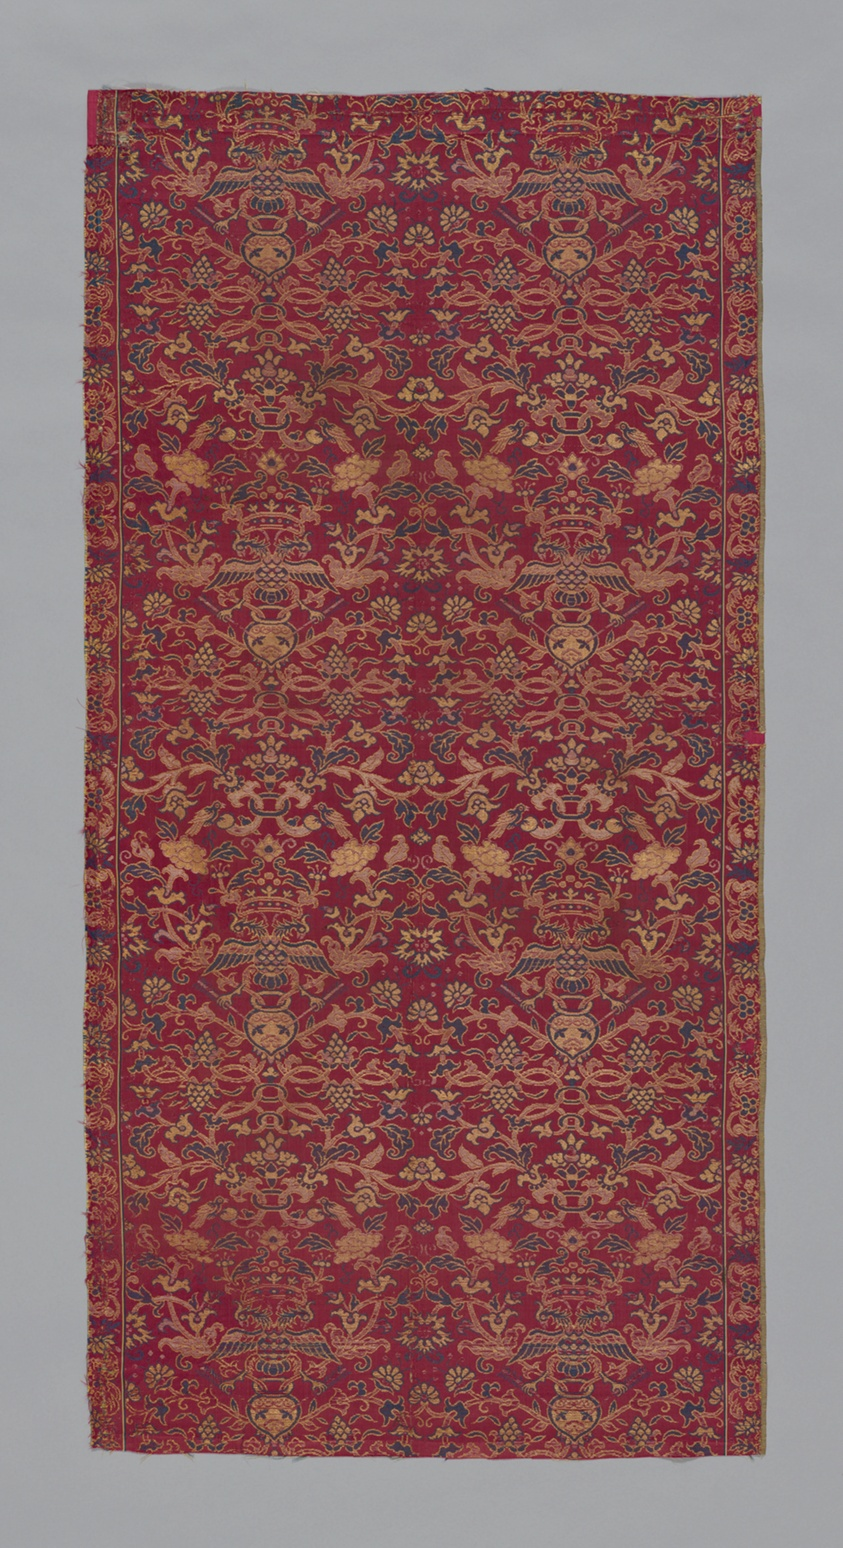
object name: Textile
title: Panel (Furnishing Fabric)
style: qing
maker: China, Guangzhou (Canton) or Macao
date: late Ming (1368–1644) or early Qing dynasty (1644–1912)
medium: Silk, warp-float faced satin weave self-patterned by ground wefts bound in twill interlacings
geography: Macau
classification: textile; weaving; furnishing textile